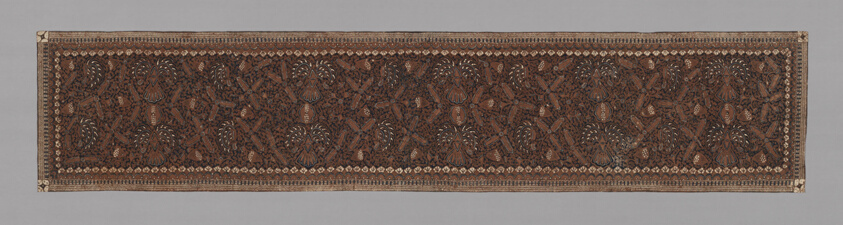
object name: Textile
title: Hanging/ Sash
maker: Indonesia, Java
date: 19th century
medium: Batik dyed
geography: Java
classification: textile; costume; weaving